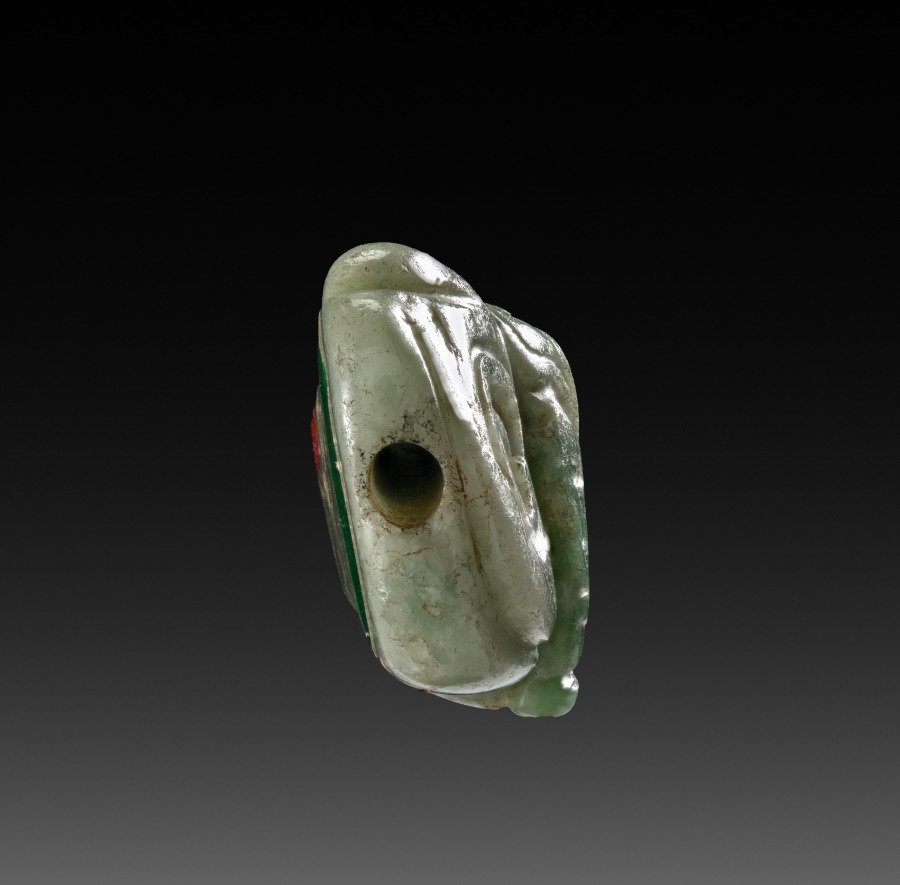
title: Pendant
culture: Maya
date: 250–900 CE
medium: jadeite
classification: Jade